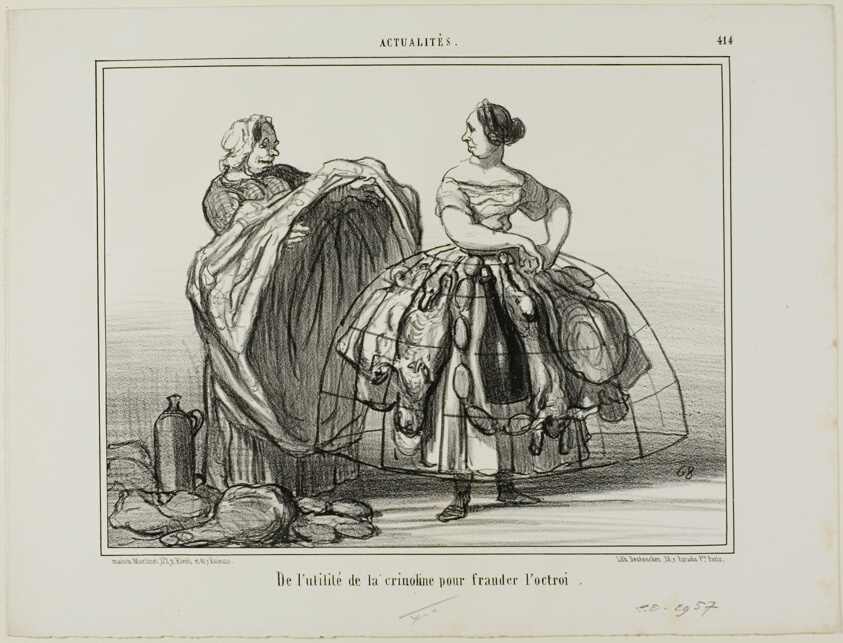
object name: Print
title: The usefulness of the crinoline when cheating the customs, plate 414 from Actualités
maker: Honoré Victorin Daumier; French, 1808-1879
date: 1857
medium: Lithograph in black on white wove paper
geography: France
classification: lithograph; print; prints and drawing